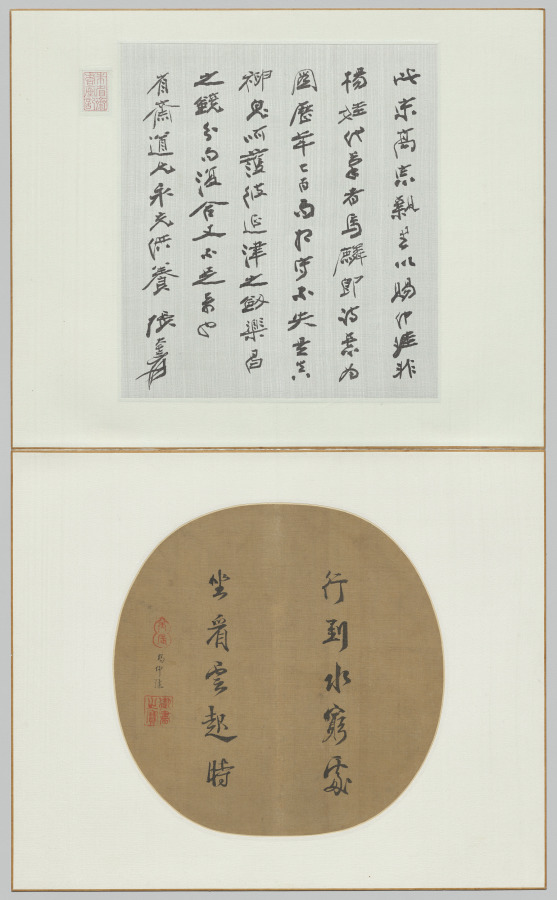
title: Poem by Wang Wei in the Cursive Script Style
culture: China, Southern Song dynasty (1127-1279)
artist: Song Lizong (Chinese, 1205–1264)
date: 1256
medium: Album leaf; ink on silk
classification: Calligraphy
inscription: 行到水窮處 坐看雲起時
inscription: The inscription between the two imperial seals reads, "Presented to Chung-kuei".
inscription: The top gourd-shaped seal has the cyclical date "bingchen" (丙辰 1256); the lower square seal is the Seal for Imperial Calligraphy.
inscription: The facing leaf has an inscription by Zhang Daqian 張大千 (1899–1983).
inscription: 1 seal of Chu Sheng-chai (20th Century) remounted onto the facing leaf to the left of the square calligraphy.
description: Poem and painting, once mounted together as one fan, exemplify the collaboration between imperial patron and court painter. Emperor Lizong’s calligraphy cites a verse from Wang Wei’s (701–761) poem, Walking to where the water ends, I sit and watch when clouds arise. Ma Lin’s response is this painting. At the water’s edge, a scholar reclines by a large rock. The view leads across the empty middle ground to a distant mountain. With sparse ink and subtly graded washes, Ma Lin visualizes the poetic verse. The painting suggests the impact of Chan aesthetics through interaction between the palace, literati-officials, and monasteries around Hangzhou. The leaf facing Emperor Lizong’s calligraphy has an inscription by Zhang Daqian (1899–1983).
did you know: Emperor Lizong had little interest in governmental affairs, but he was perhaps the finest calligrapher among the Song emperors.